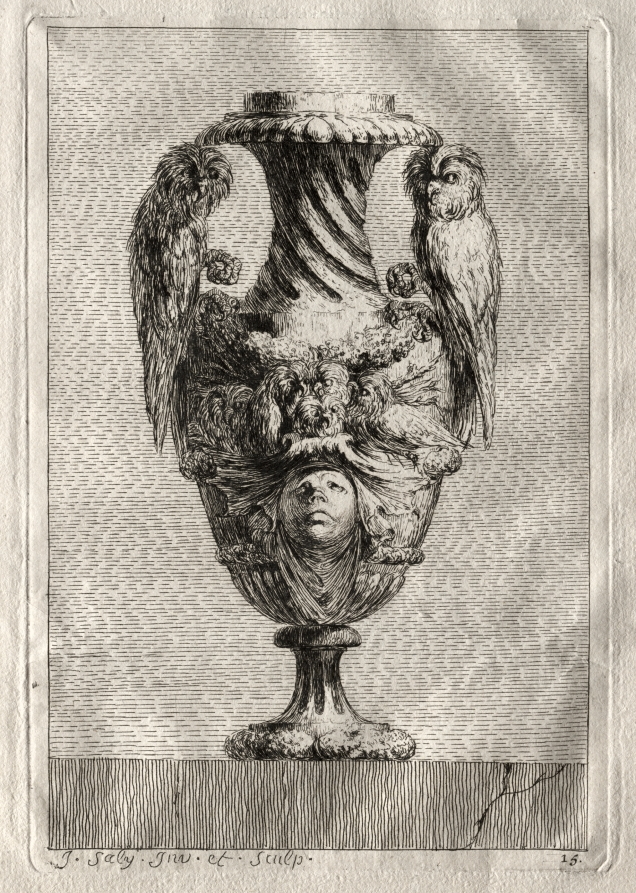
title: Suite of Vases: Plate 15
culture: France, 18th century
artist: Jacques François Saly (French, 1717–1776)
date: 1746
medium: etching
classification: Print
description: Trained as a sculptor, Saly etched a series of 30 vase designs while studying at the Académie de France in Rome. After his return to Paris, the publication announcement for the Suite of Vases endorsed the prints as an indication of the sculptor’s ingenuity and freedom of design. The vase designs also nourished an appetite for the revival of classical elements, or Neoclassicism, in decorative arts that developed in the mid-18th century.